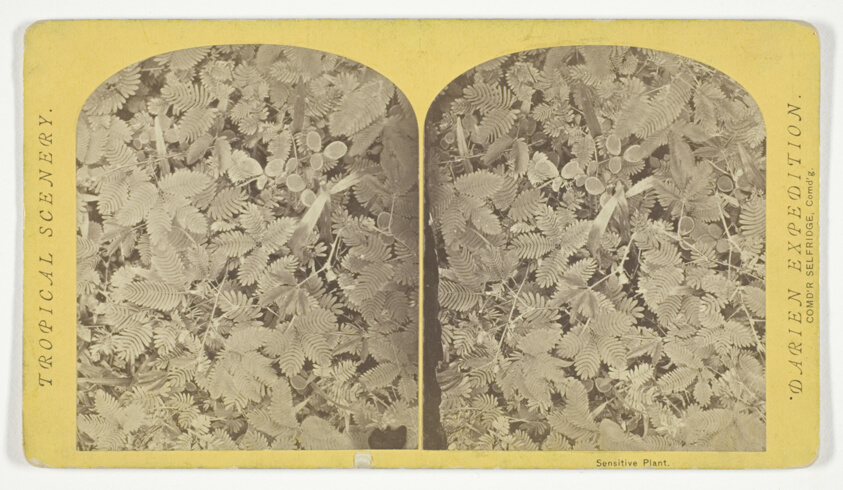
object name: Photograph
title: Sensitive Plant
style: 19th century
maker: Timothy O'Sullivan (American, born Ireland, 1840–1882)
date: 1870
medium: Albumen print, stereo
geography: United States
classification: stereograph (albumen); albumen silver print; photographic process; photography; photograph